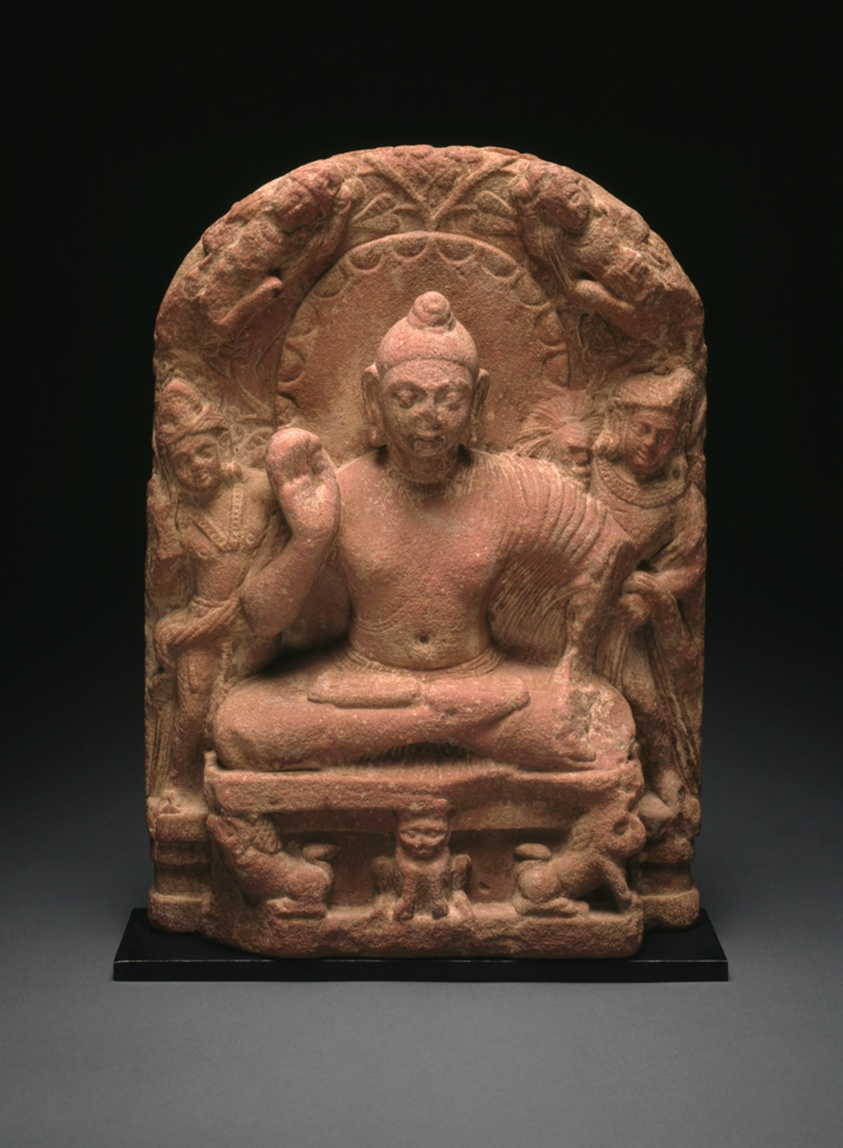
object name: Sculpture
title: Buddha Shakyamuni with Attendants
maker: India; Uttar Pradesh, Mathura region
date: Kushan period, 2nd century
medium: Sandstone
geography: Mathura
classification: sandstone; stone; sculpture; asian art